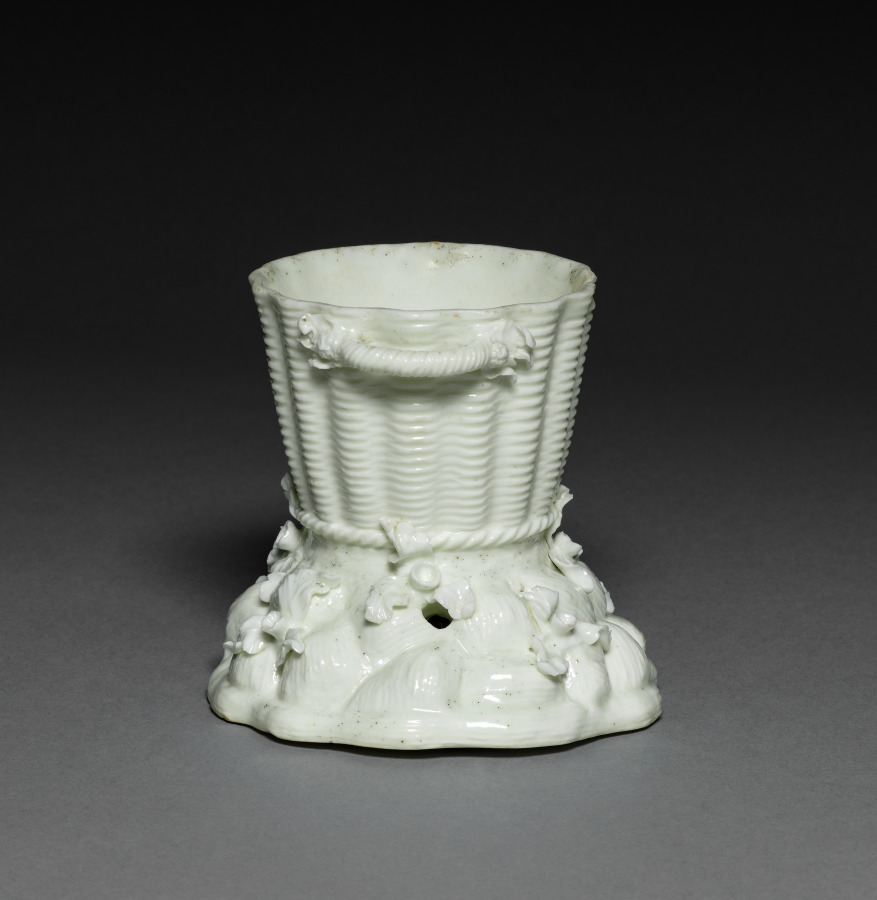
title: Potpourri Vase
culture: France, Saint Cloud, 18th century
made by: Saint Cloud Porcelain Factory (French)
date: mid-1700s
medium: soft-paste porcelain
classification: Ceramic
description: A vase like this was created to contain potpourri, a mixture of flowers, herbs, and spices emitting ambient fragrance. This specific function offered a particularly fertile ground for the development of French porcelain, as manufactories experimented with forms, surface ornamentations, and placement of perforations.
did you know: Prior to Saint-Cloud's development of soft-paste porcelain in the 1690s, rumors spread throughout Europe that the prized material was made by burying a variety of materials, including lobster shells, in the ground for eighty years.